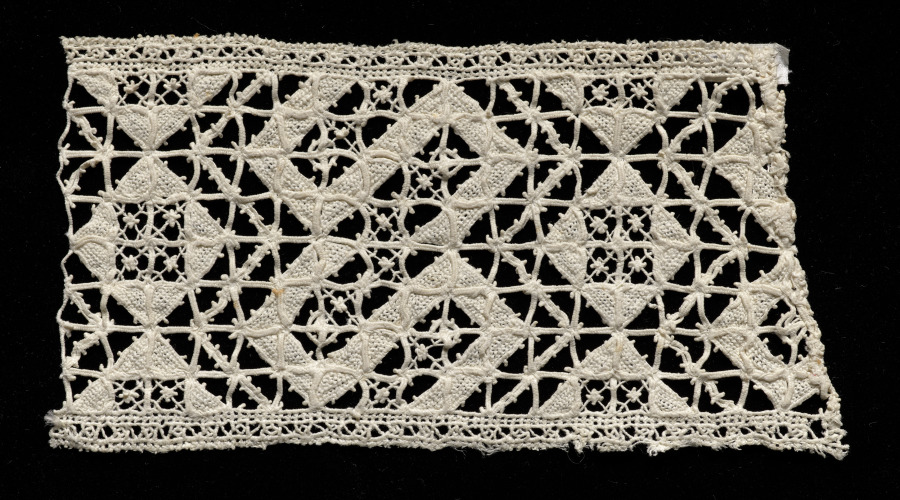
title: Lace Fragment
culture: Italy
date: 1500s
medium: Linen: needle lace (cutwork, punto tagliato)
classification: Lace